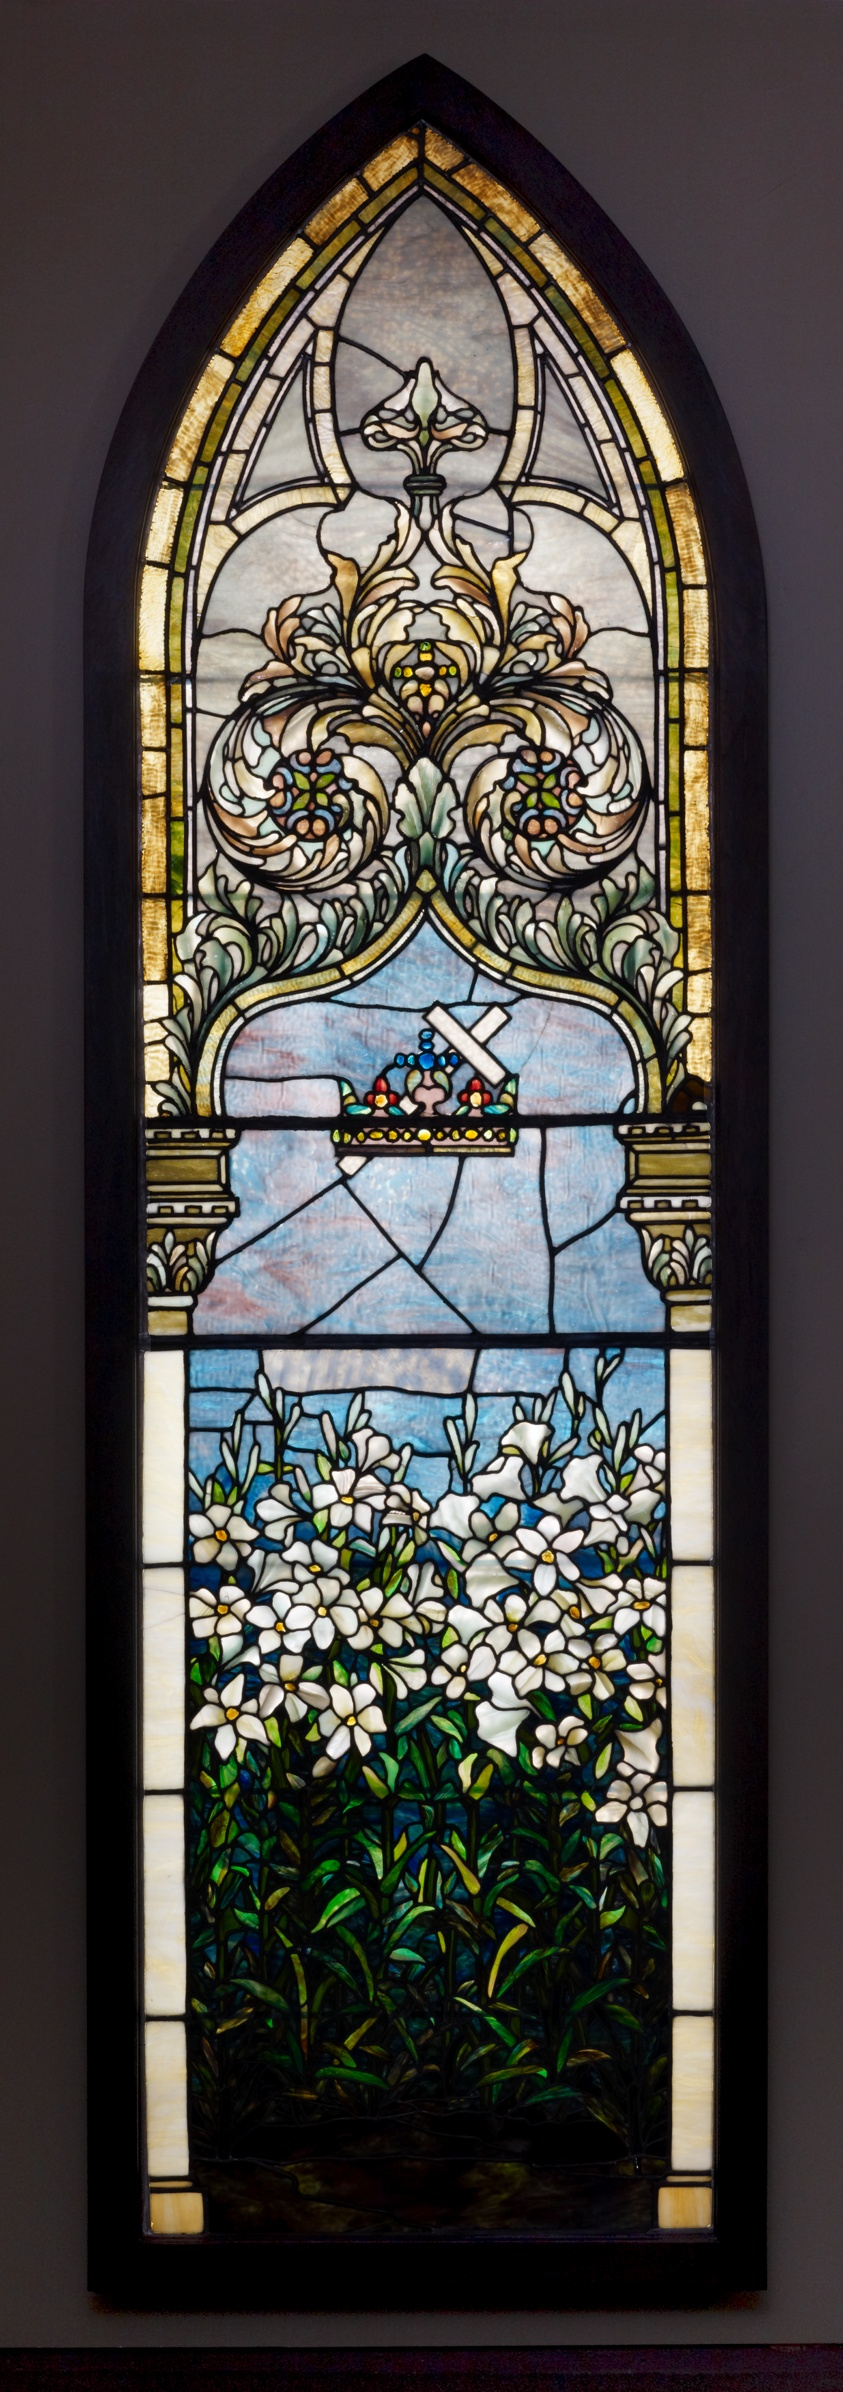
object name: Architectural fragment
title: Lilies (Corey Memorial Window)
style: Arts and Crafts Movement, American Arts and Crafts Movement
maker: Tiffany Glass and Decorating Company (American, 1894–1902); Corona, New York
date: 1892–95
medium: Leaded Favrile glass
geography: Corona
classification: stained glass/leaded glass; american decorative arts; decorative arts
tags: Chicago, architecture